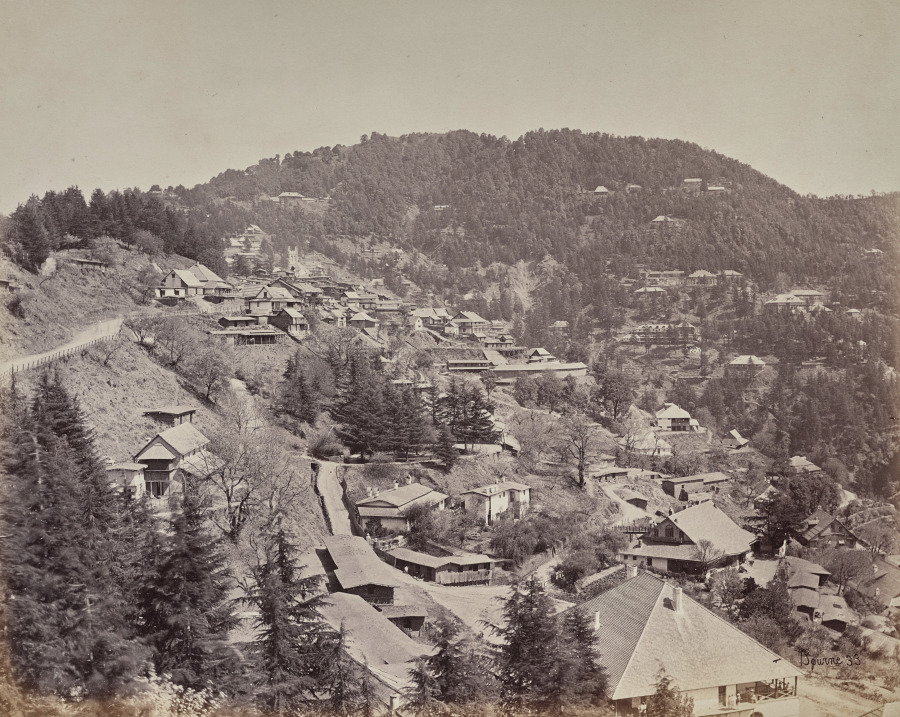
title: Shimla. Houses of European Residents, Looking East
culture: England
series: Photographs of Northern India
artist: Samuel Bourne (British, 1834–1912)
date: 1863–70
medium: albumen print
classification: Photograph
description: The 50 images in this album, all taken in the 1860s, move from the hill towns of the Himalayas down to cities including Lahore (now in Pakistan), Delhi, Lucknow, Agra, Benares (now Varansi), and Calcutta (now Kolkata). Architectural studies of major monuments offer valuable historical records of what sites such as the Taj Mahal and the imperial mosque of the Mughal emperors in Delhi looked like before twentieth-century restorations.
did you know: Samuel Bourne, the author of most the images in this album, was a banker in England before he moved to India to become a professional photographer.